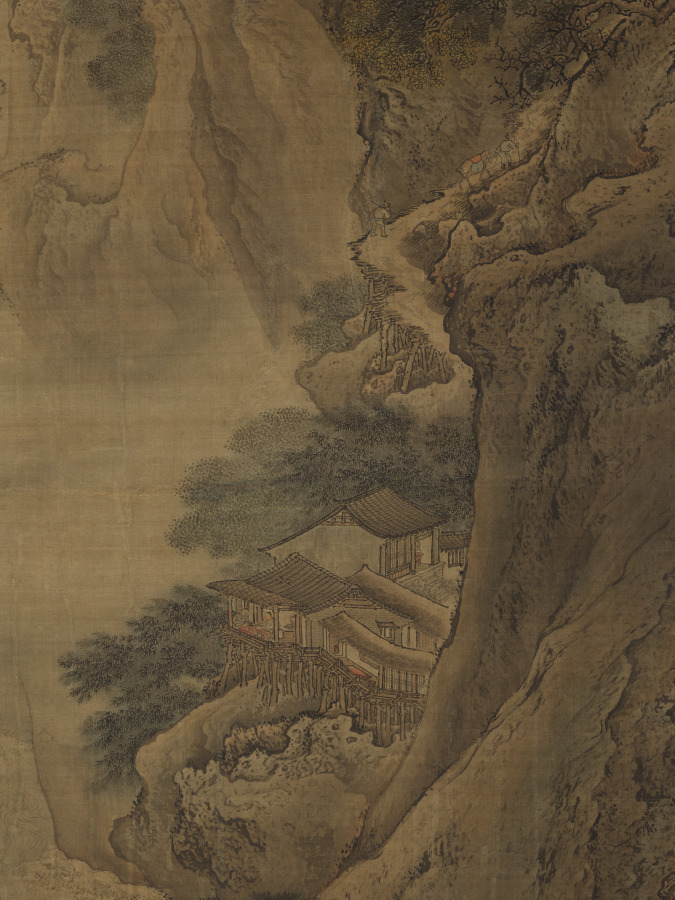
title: Road to Shu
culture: China, Qing dynasty (1644–1911), Qianlong reign (1736–95)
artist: Yuan Yao (Chinese, active mid-1700s)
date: 1743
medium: Hanging scroll; ink and color on silk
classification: Painting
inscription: artist's seals: yuan yao shi yin 袁耀 之印, zhao dao shi 昭道 氏 two collector’s seals: jin ju and illegible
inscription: Shu han xinglü //shi guihai xia //Hanshang Yuan Yao hua// 蜀椷行旅时癸亥夏- 邗上 袁耀 画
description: Few works by the Yuan workshops in Yangzhou present a continuous composition of such monumental scale as this hanging scroll. Road to Shu (in Sichuan province) depicts the trade of goods over long distances and through mountainous terrain. Busy travelers lead mules over footbridges, mountain paths wind along steep slopes, and soaring bridges connect peaks divided by deep gorges. The Yuan studios produced paintings to decorate the residences of wealthy Yangzhou salt merchants and princely palaces. The title Road to Shu refers to the historical drama of the flight of Tang emperor Xuanzong (reigned 712–56) to Sichuan in the aftermath of the An Lushan Rebellion (755–63). At the same time, the scenery alludes to Anhui, the mountainous native country of many of the salt merchants and their trade routes in northern parts of the empire.